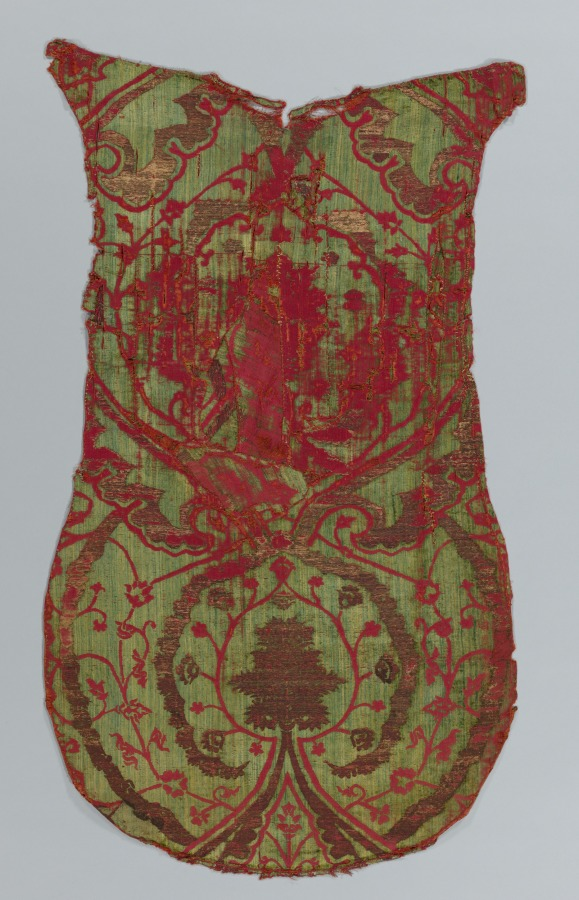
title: Chasuble Front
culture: Turkey, 16th century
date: 16th century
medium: velvet; silk and metallic thread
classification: Velvet